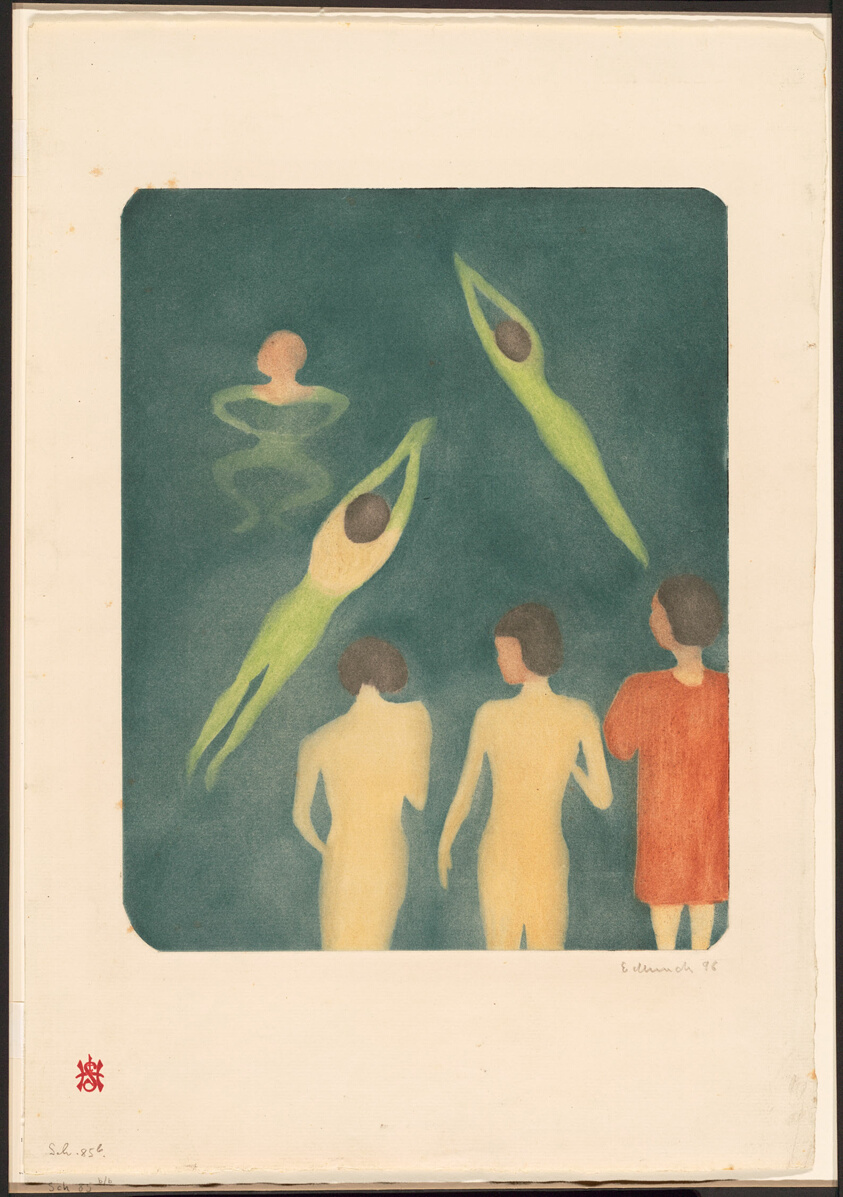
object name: Print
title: Boys Bathing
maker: Edvard Munch (Norwegian, 1863-1944); probably printed by Porcaboeuf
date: 1896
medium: Color burnished aquatint, inked à la poupée, on buff laid paper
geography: Norway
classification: aquatint; print; prints and drawing